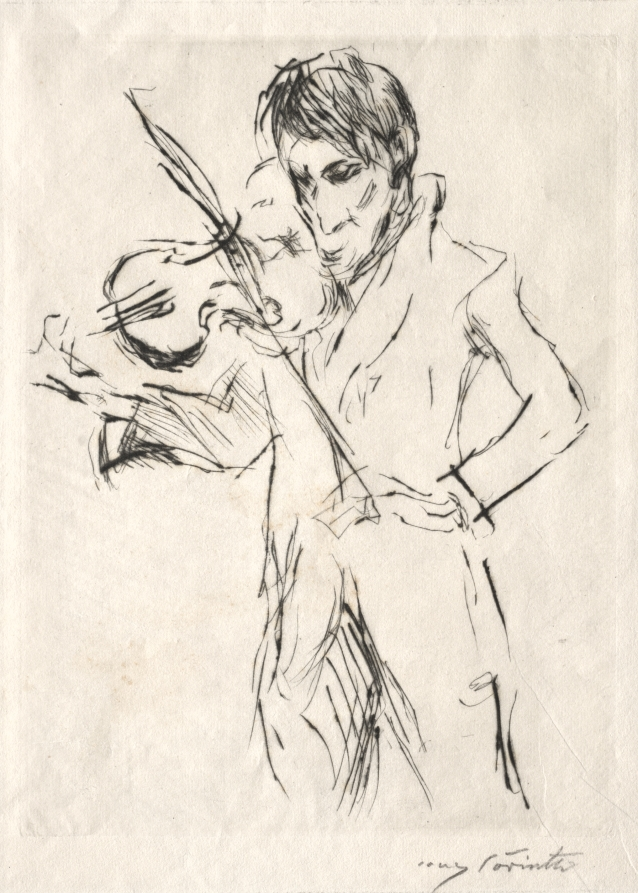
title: Andreas Weissgaerber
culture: Germany, 20th century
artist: Lovis Corinth (German, 1858–1925)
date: 1919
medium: drypoint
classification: Print